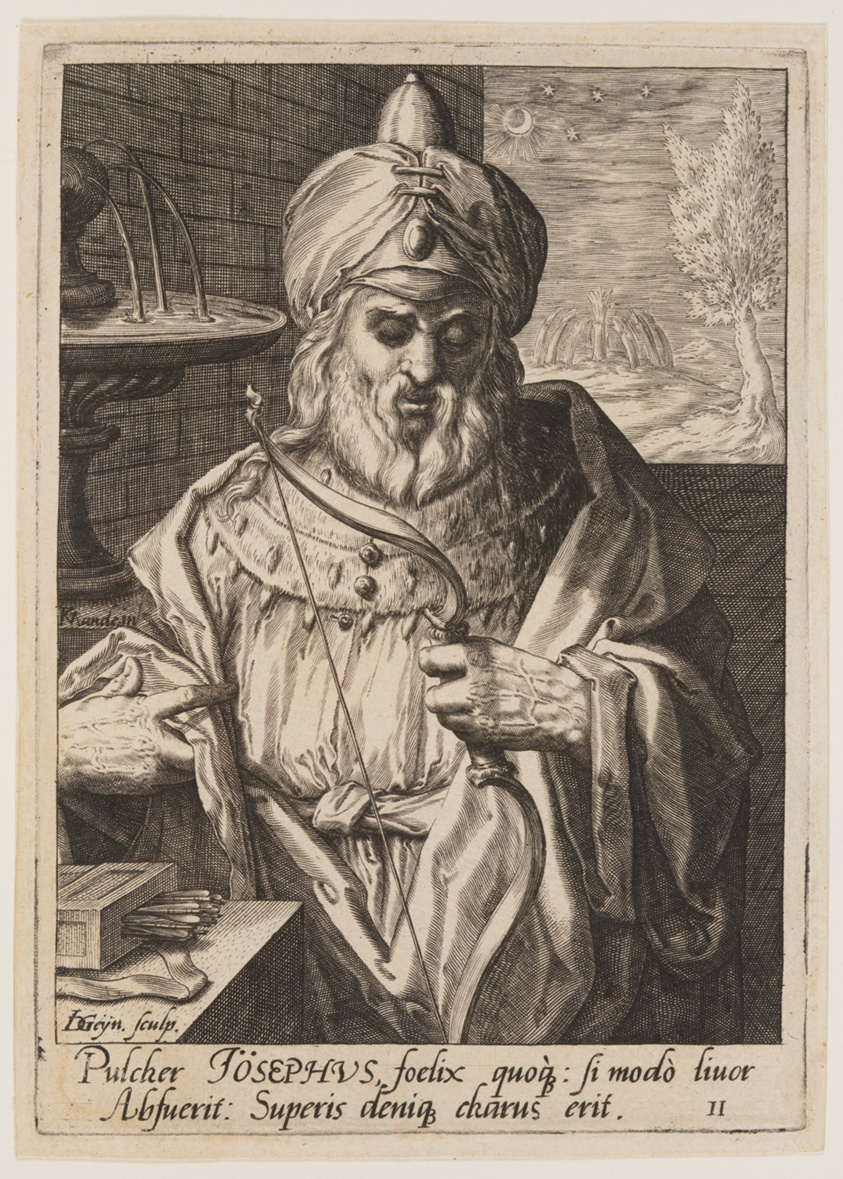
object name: Print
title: Joseph, from The Twelve Sons of Jacob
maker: Jacques de Gheyn II (Dutch, 1565–1629); after Karel van Mander (Dutch, 1548–1606)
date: c. 1589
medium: Engraving on ivory laid paper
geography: Netherlands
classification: engraving; paper; print; prints and drawing